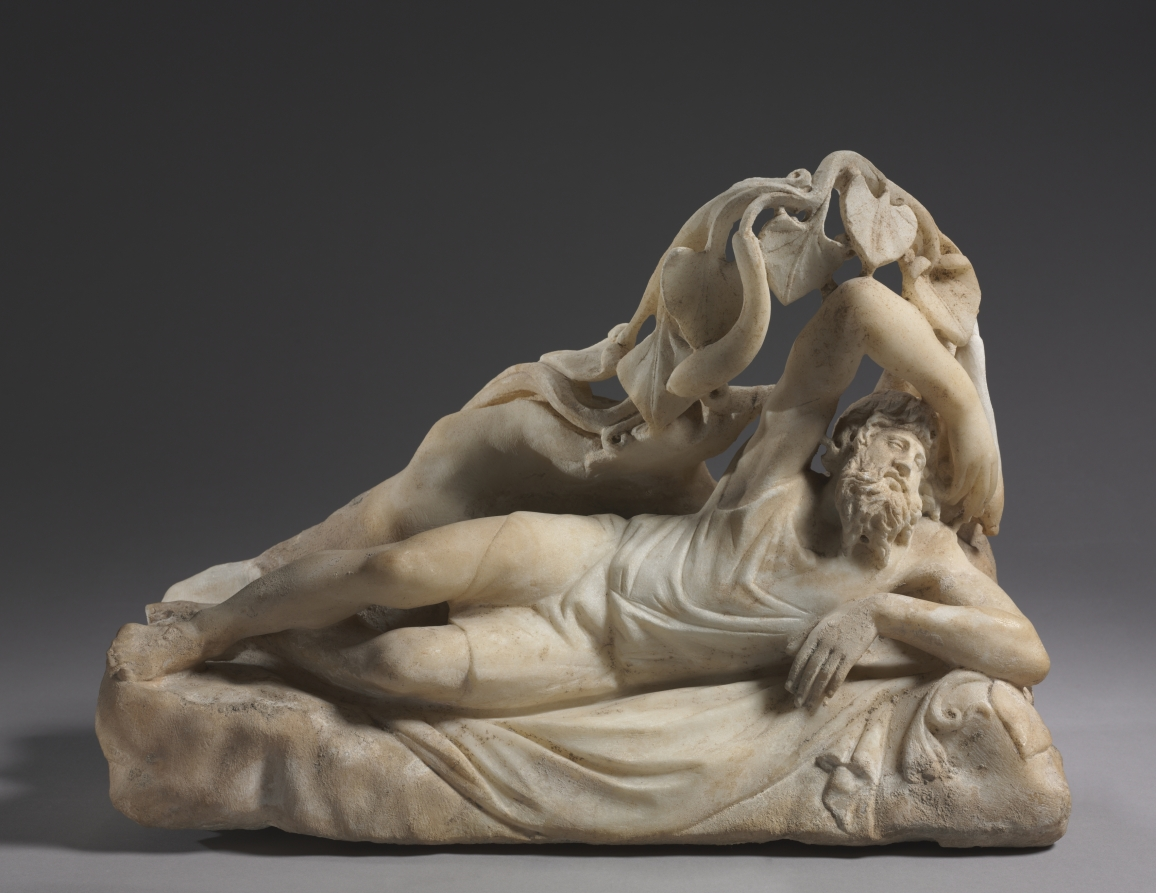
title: Jonah Under the Gourd Vine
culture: Anatolia, late Roman-early Christian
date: 280–90 CE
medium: marble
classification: Sculpture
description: After disobeying the Lord’s command to proclaim judgment on the city of Nineveh, the Old Testament prophet Jonah was cast into the sea, swallowed by a sea monster, and ultimately cast ashore. When asked a second time, Jonah obeyed the Lord but became displeased when the city was spared. After pleading for Nineveh’s destruction, Jonah left the city and rested in the shadow of a large gourd vine. The Lord, however, made the vine wither, exposing Jonah to the burning sun.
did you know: The sculpture shows the dramatic moment when the Jonah, having languished in the desert, is saved by the shade of a gourd vine. The sculptor paid great attention to detail such as Jonah's bushy beard echoing the large leaves overhead.